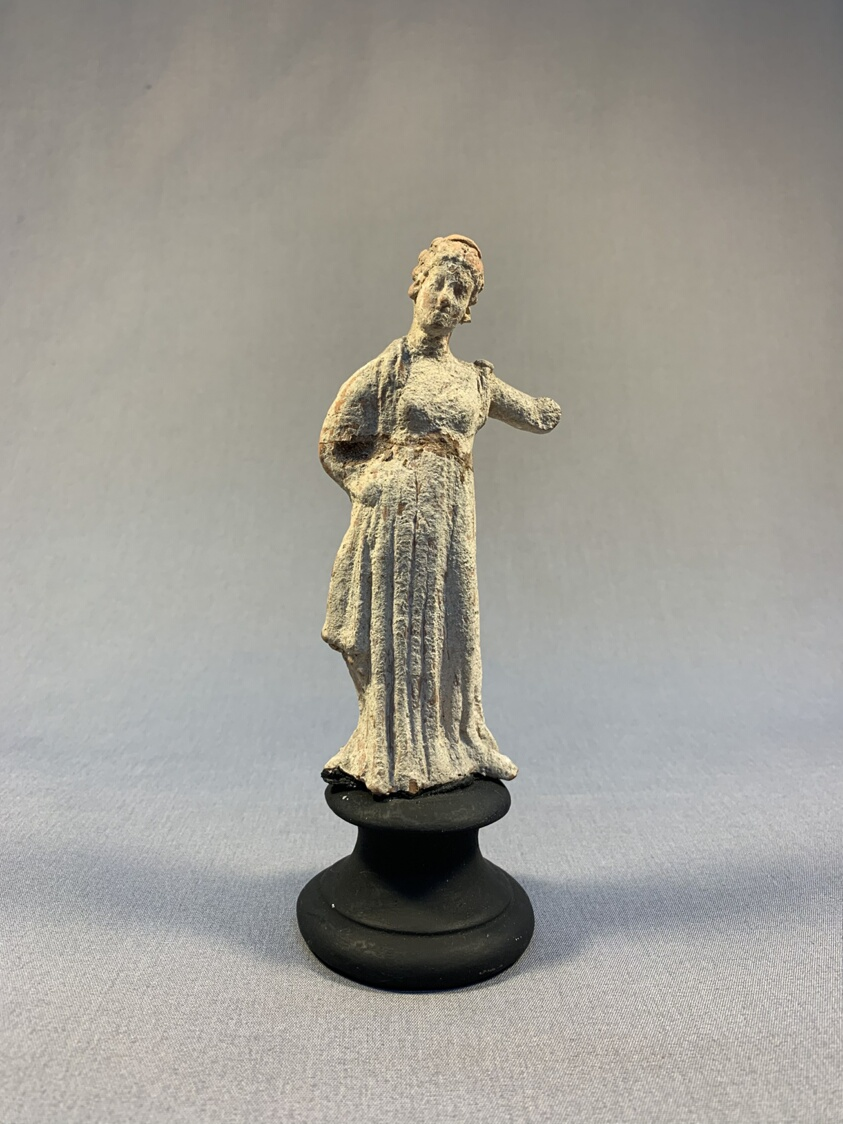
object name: Sculpture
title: Figurine of a Standing woman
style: greek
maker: Greek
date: 4th-3rd century BCE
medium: terracotta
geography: Greece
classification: earthenware; ceramics; sculpture; ancient art